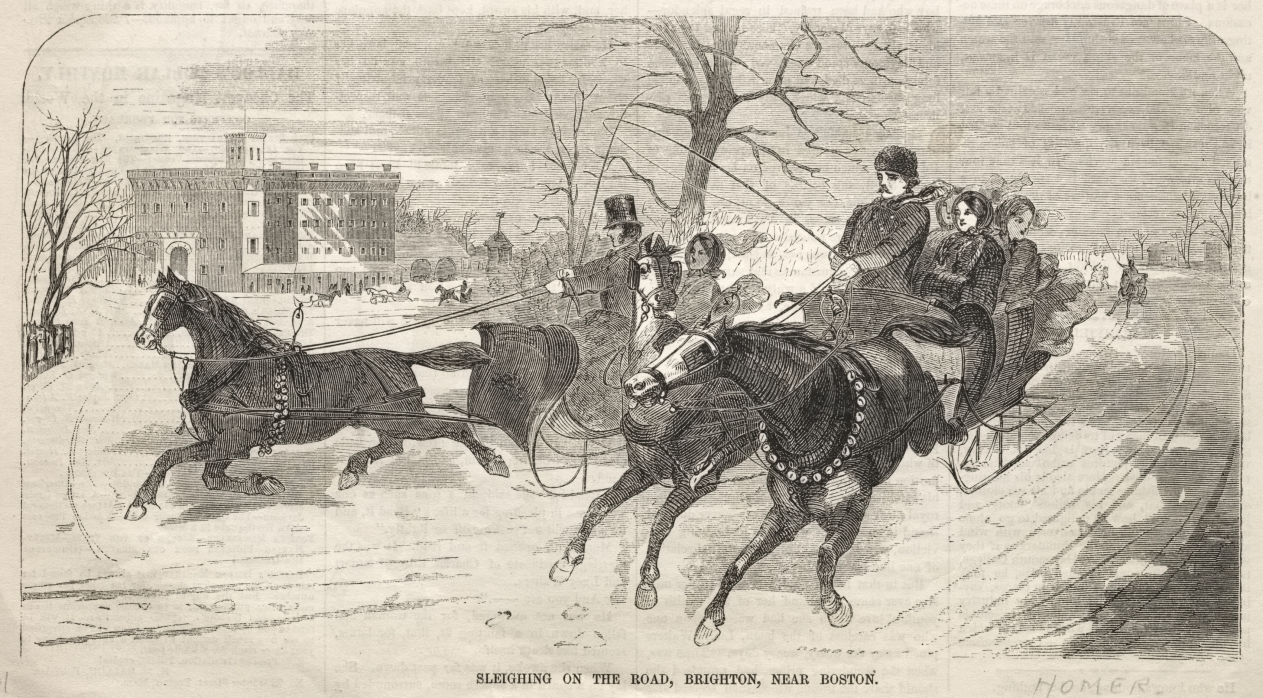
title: Sleighing on the Road, Brighton, near Boston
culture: America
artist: Winslow Homer (American, 1836–1910)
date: 1859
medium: wood engraving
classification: Print